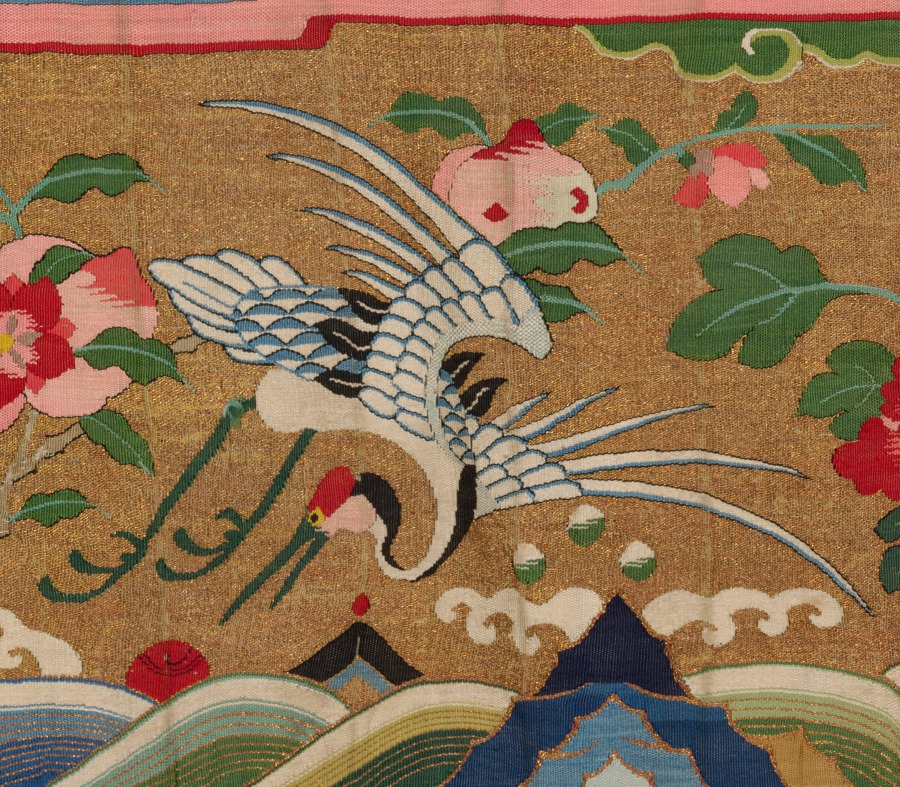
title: Strip of Silk Tapestry (Kesi)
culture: China, Qing dynasty (1644–1911)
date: 1700s–1800s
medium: Silk and gold thread; tapestry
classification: Tapestry